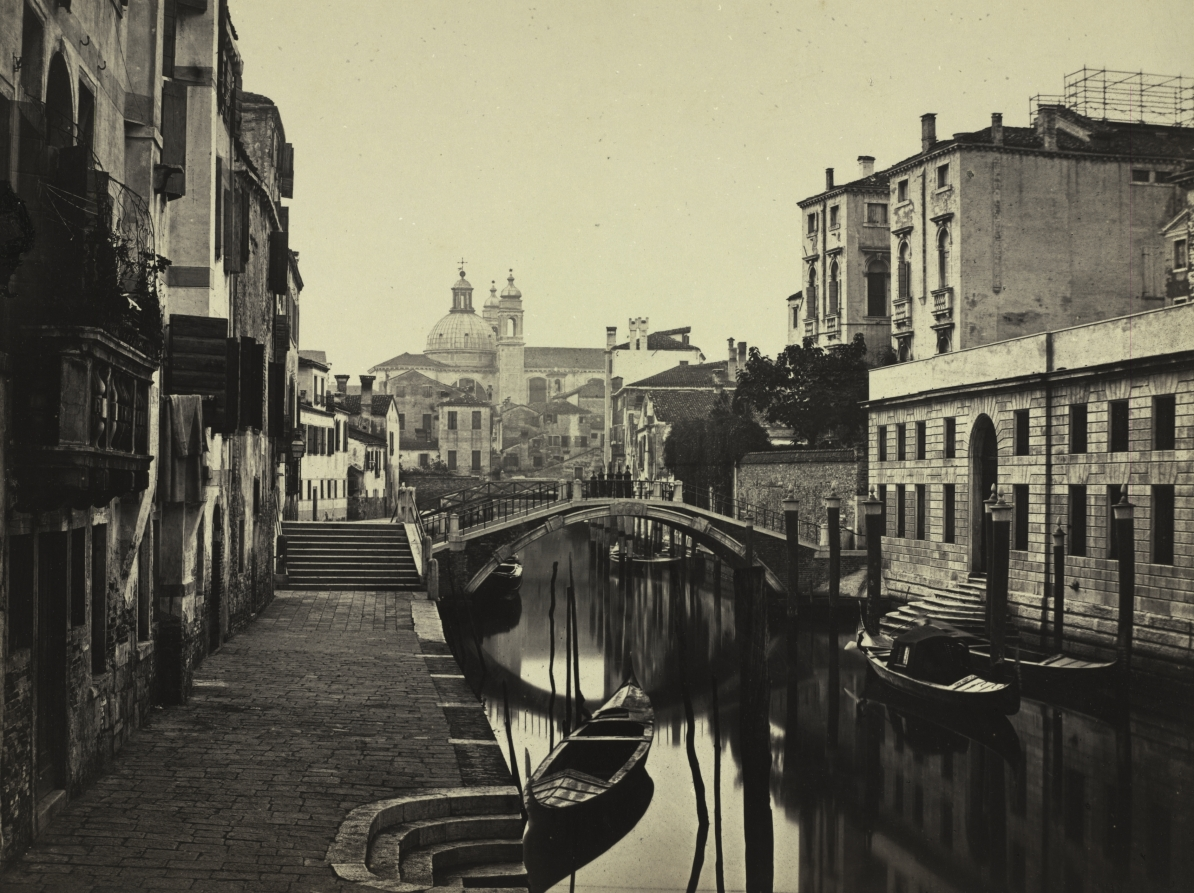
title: View of Venice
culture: Italy, 19th century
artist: Carlo Ponti (Italian, 1822–1893)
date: c. 1860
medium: albumen print from wet collodion negative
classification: Photograph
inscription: Written in black ink on label on verso: "Canal intérieur et rio de l'église des Toussaints. / Ce nom de rio est donné à tous les canaux intérieurs de Venise. Dans ce canal on voit à droite les approches des palais Giustiniani et Priuli, et au fond, l'église de Sainte Marie du Rosaire."